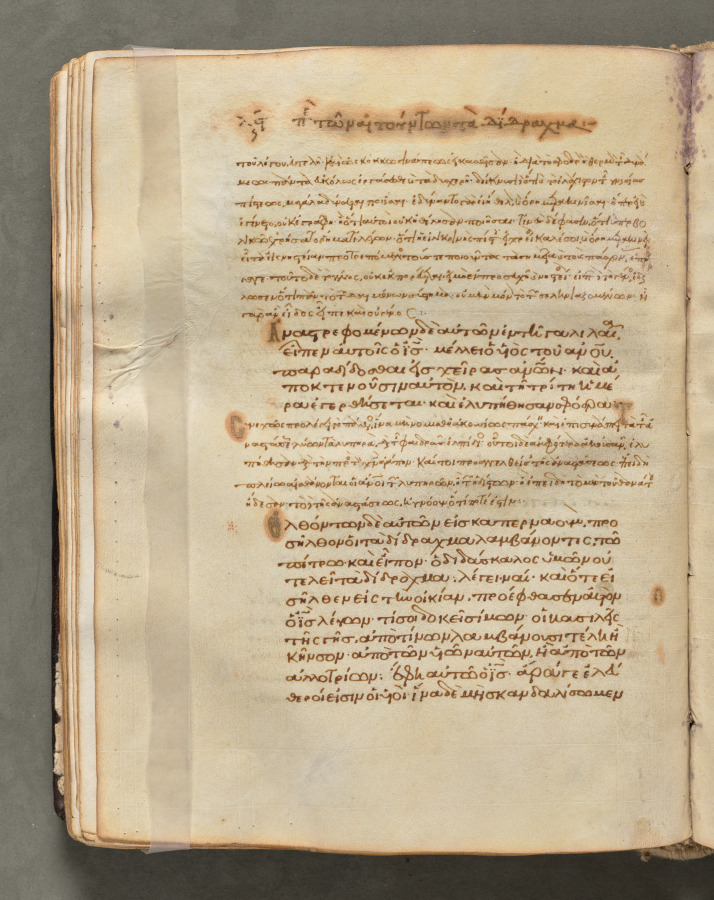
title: Text, folio 78 (verso), from a Gospel Book with Commentaries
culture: Byzantium, Constantinople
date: c. 1000–1100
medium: ink, tempera, and gold on vellum; leather binding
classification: Bound Volume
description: Each of the four gospels in this book opens on a page with brilliantly illuminated borders depicting the author of the text as well as birds-principally peacocks, symbols of the immortality of the soul-and fountains, representing the fountain of life and the salvation of the soul. This volume consists of 428 leaves with texts in Greek. Its level of sophistication suggests that it was probably written and decorated in a monastery in Constantinople.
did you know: Gospel Books were carried in procession through Byzantine churches.